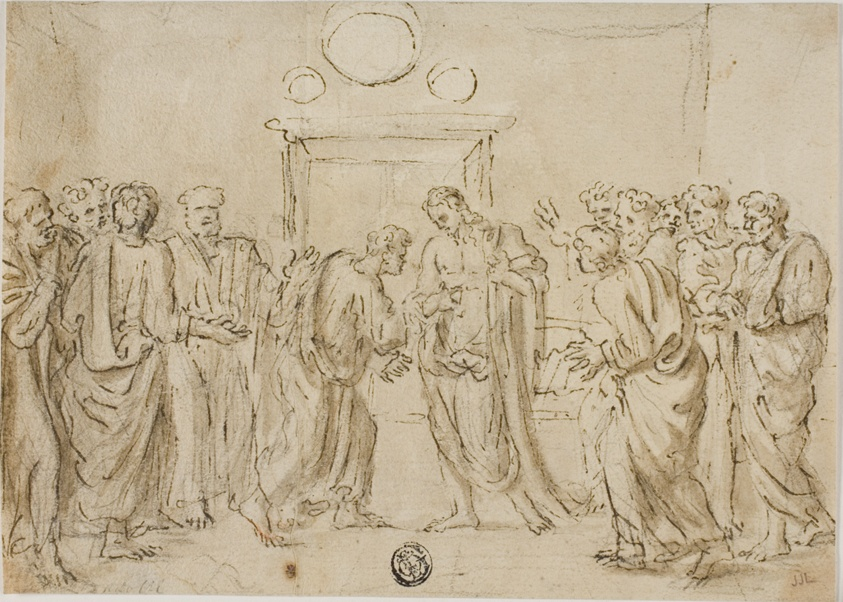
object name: Drawing and Watercolor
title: The Incredulity of Saint Thomas (recto); Sketches of Figures (verso)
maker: Style of Nicolas Poussin (French, 1594-1665)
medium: Pen and brown ink, with brush and brown wash, over graphite and traces of red chalk (recto), and graphite (verso), on cream laid paper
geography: France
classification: pen and ink drawings; drawings (visual works); prints and drawing